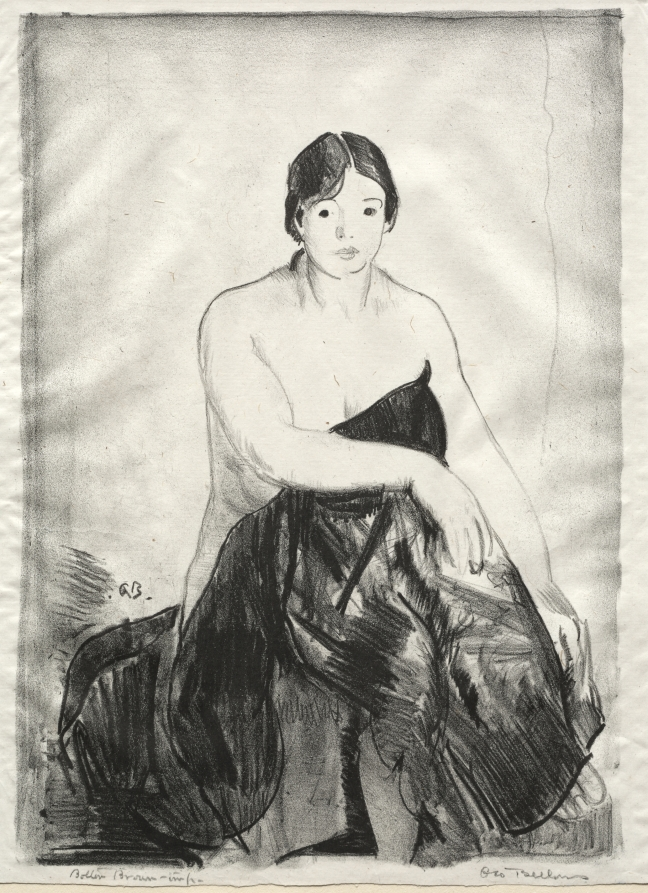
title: The Model, Second Stone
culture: America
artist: George Bellows (American, 1882–1925)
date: 1917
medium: lithograph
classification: Print